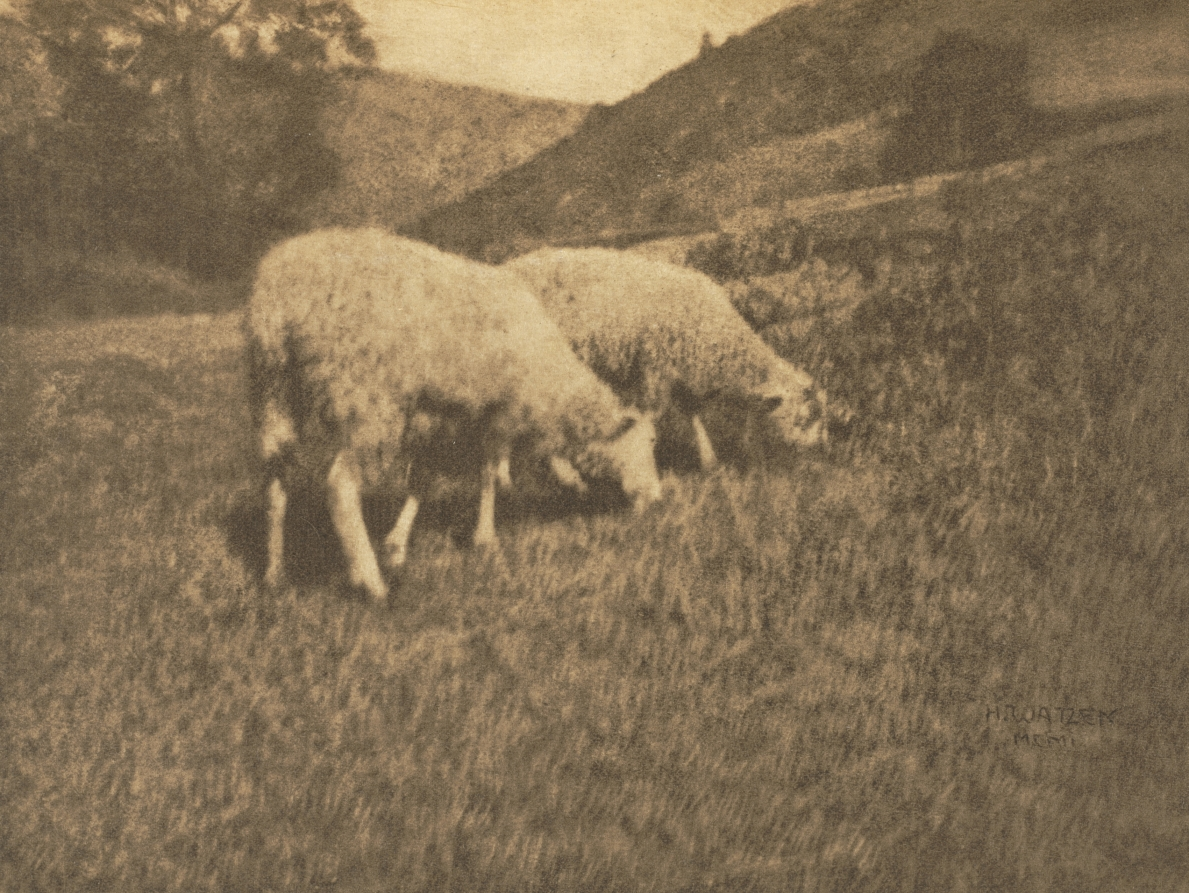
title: Camera Work: Sheep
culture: Austria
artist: Hans Watzek (Austrian, 1848–1903)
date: 1906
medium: photogravure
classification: Bound Volume